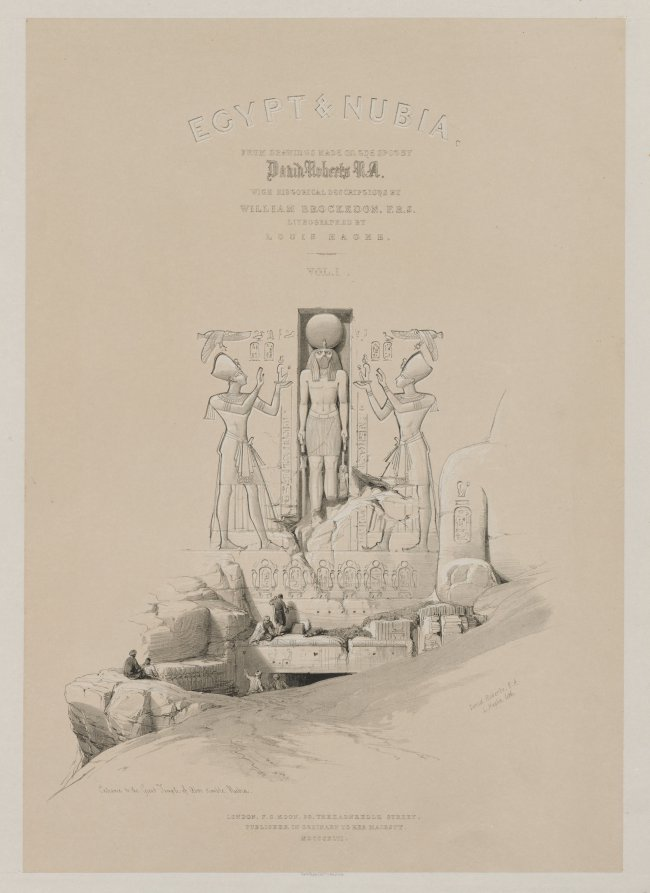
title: Egypt and Nubia, Volume I: Frontispiece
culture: England, 19th century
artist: Louis Haghe (British, 1806–1885)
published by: F. G. Moon, 20 Threadneedle Street, London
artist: after David Roberts (Scottish, 1796–1864)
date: 1846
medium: color lithograph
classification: Print